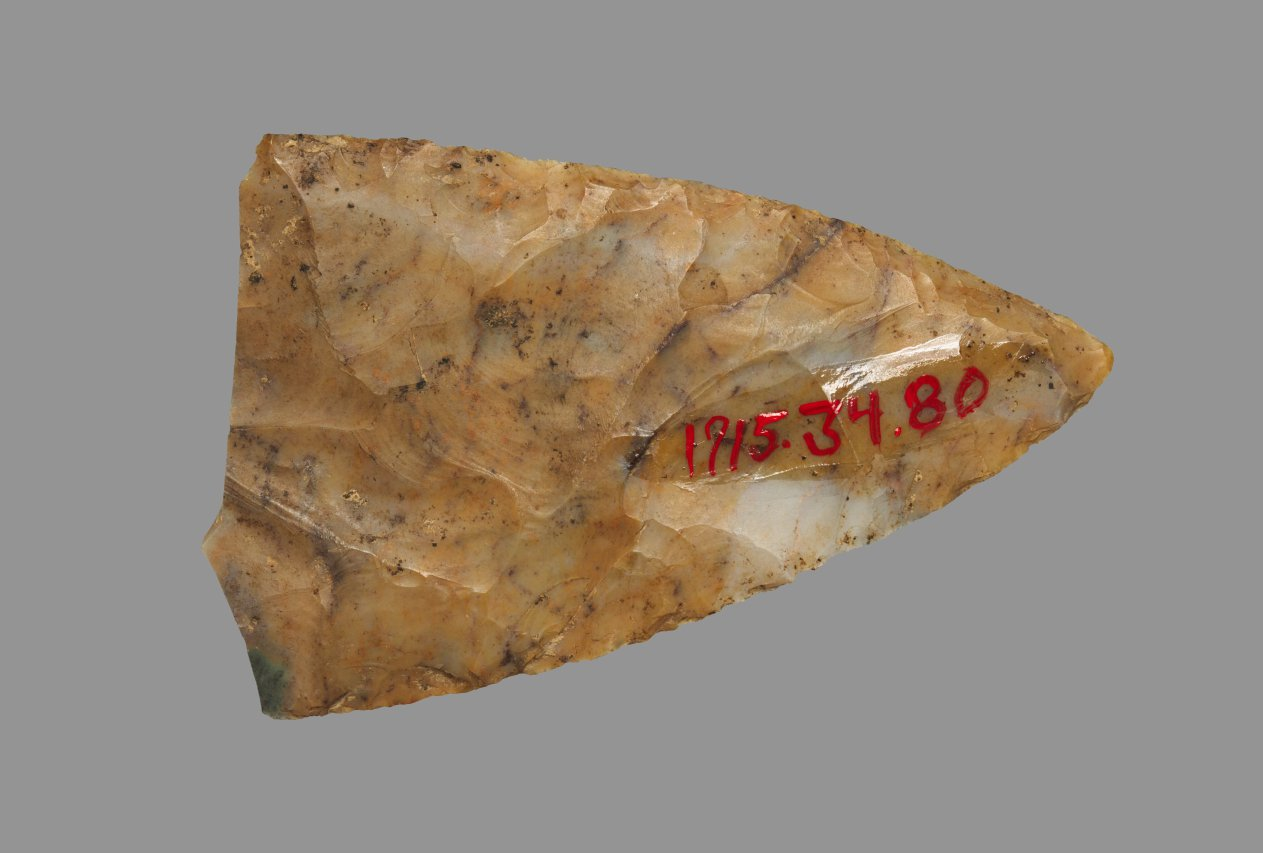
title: Sickle Blade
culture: Egypt, Middle Kingdom (2040–1648 BCE), Dynasty 12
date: 1980–1801 BCE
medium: flint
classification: Implements